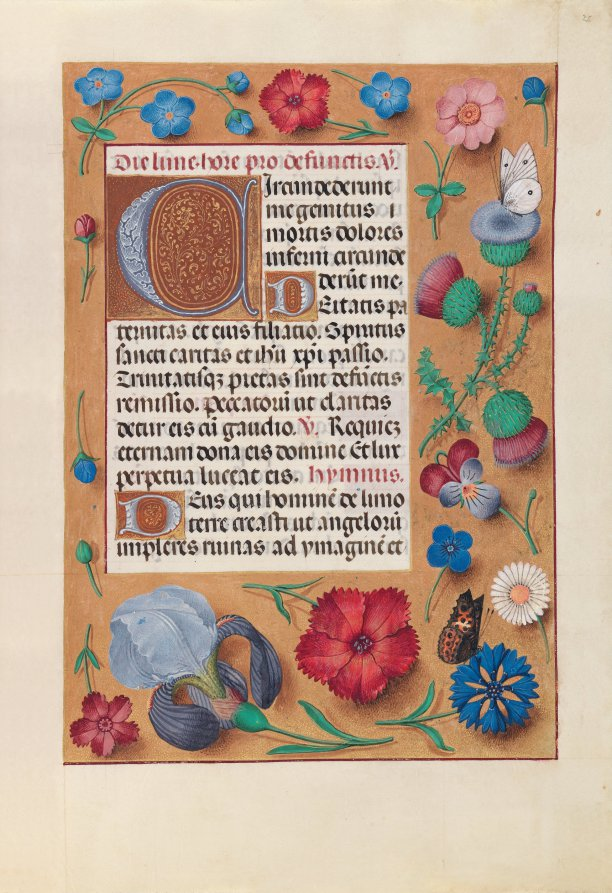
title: Hours of Queen Isabella the Catholic, Queen of Spain: Fol. 25r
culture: Flanders, Ghent and Bruges, late 15th century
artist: Master of the First Prayerbook of Maximillian (Flemish, c. 1444–1519)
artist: and Associates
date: c. 1500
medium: ink, tempera, and gold on vellum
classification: Bound Volume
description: A great lover of Flemish art, Queen Isabella treasured her many devotional books. This deluxe manuscript was created for her private devotions by highly organized and distinctly talented manuscript painters active in Ghent and Bruges. The Ghent-Bruges school represents the culmination of Flemish book painting, whose main features were the use of rich colors, illusionistic effects, a love of landscape, and a strong sense of visual narrative. Manuscripts produced by this circle of artists are renowned for their border decoration featuring a rich variety of realistically painted flowers, scrolling acanthus leaves, birds, and butterflies.